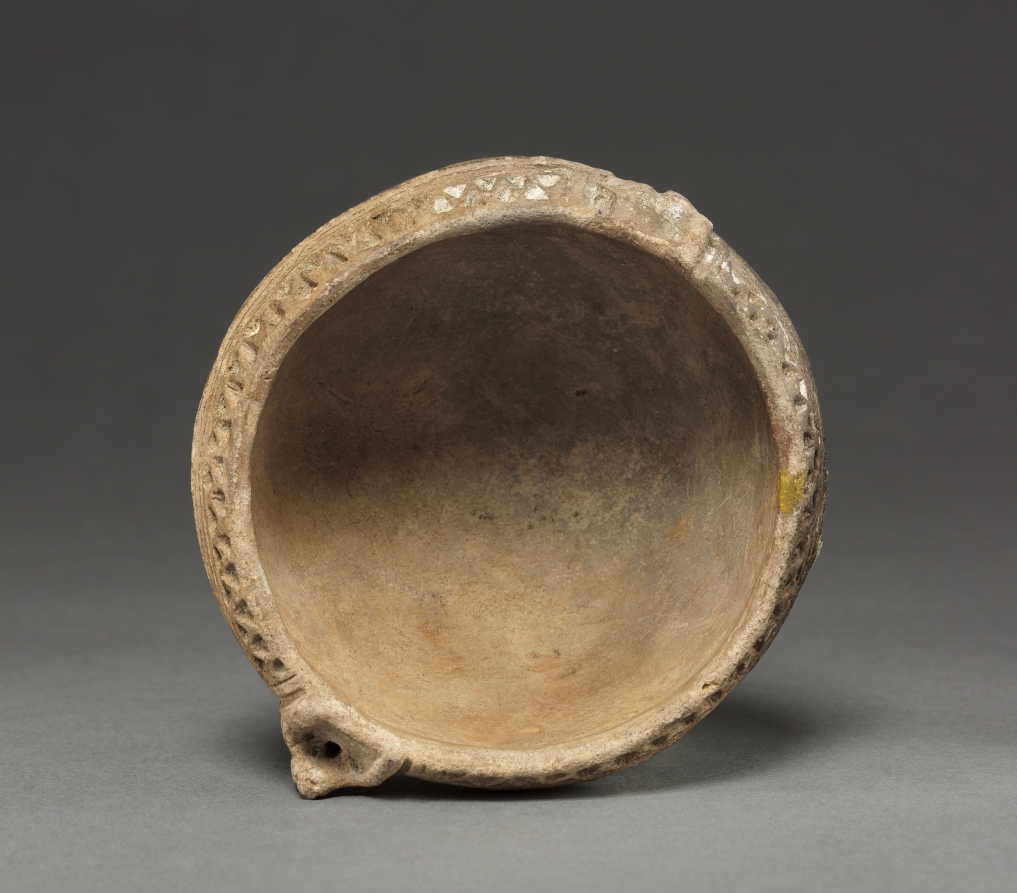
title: Jar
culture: Colombia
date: before 1550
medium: red ware with incised patterns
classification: Ceramic